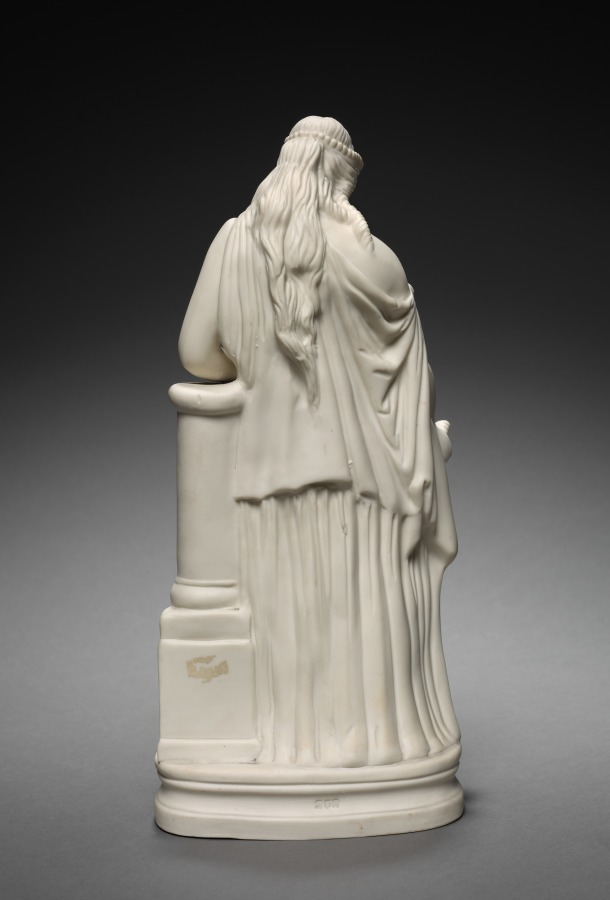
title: Figure of Medea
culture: England, 19th century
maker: W. T. Copeland & Sons (British)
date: c. 1870–1890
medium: Parian porcelain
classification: Ceramic